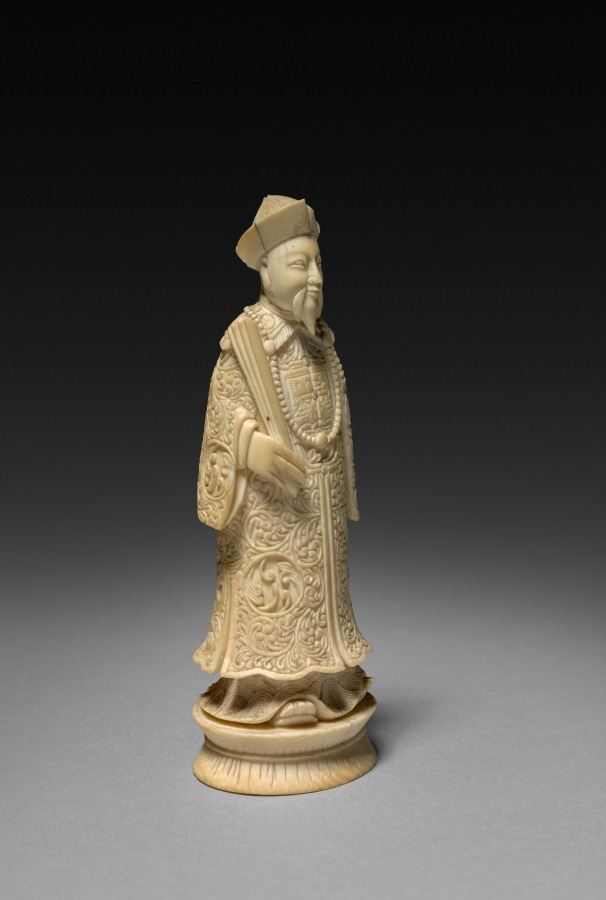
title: Chess Piece: King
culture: Japan, Meiji period (1868–1912)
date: early 1900s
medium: ivory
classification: Ivory